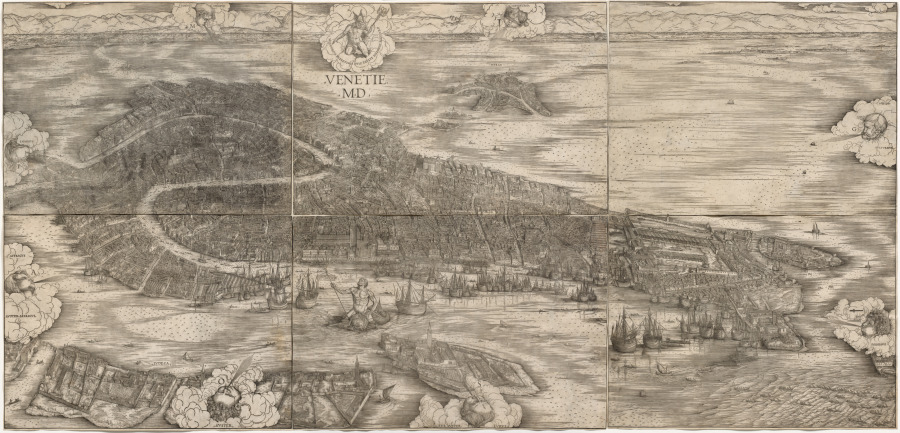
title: View of Venice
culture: Italy, early 16th Century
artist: Jacopo de' Barbari (Italian, c. 1460/70–c. 1516)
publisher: Anton Kolb (German, 1474–1566)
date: 1500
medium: woodcut from six blocks on six sheets of paper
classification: Print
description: By the end of the 1400s, Venice had emerged as the major printing center in Europe, where books were printed in various languages to be shipped around the world. The city also became the great emporium for prints, and the woodcut developed beyond its humble origins as a popular art for devotional imagery, playing cards, and later for book illustration. View of Venice epitomizes this new ambitious scope for the woodcut, and is a landmark in the history of printmaking. This monumental print can be compared in scale only to a mural decoration and presumably served as a less expensive surrogate for paintings. The six sheets that make up the design would have been pasted either onto a canvas or the wall itself, resulting in the survival of only 12 impressions of the original edition like this one, and only three in America. The goal of the print was to depict Venice as seen from above. No single vantage point would have been sufficient, so Jacopo de' Barbari and a team of surveyors climbed various towers and tall buildings to record small sections of the city. These individual views were combined to form the map which follows a single, though inconsistent, system of perspective. Unprecedented for its exactness of detail and difficulty of execution, View of Venice represents the first attempt to render the image of a city according to the laws of geometry. The view also highlights the seafaring trade activities of Venice, depicting Mercury, god of commerce, presiding over the city, while Neptune, god of the seas, keeps watch over the entrance to the city's Grand Canal.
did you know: Before the conveniences of airplanes, photography, or even a hot air balloon this monumental bird's-eye view map of Venice made in 1500 documents every building, canal, alleyway, and square in the city.